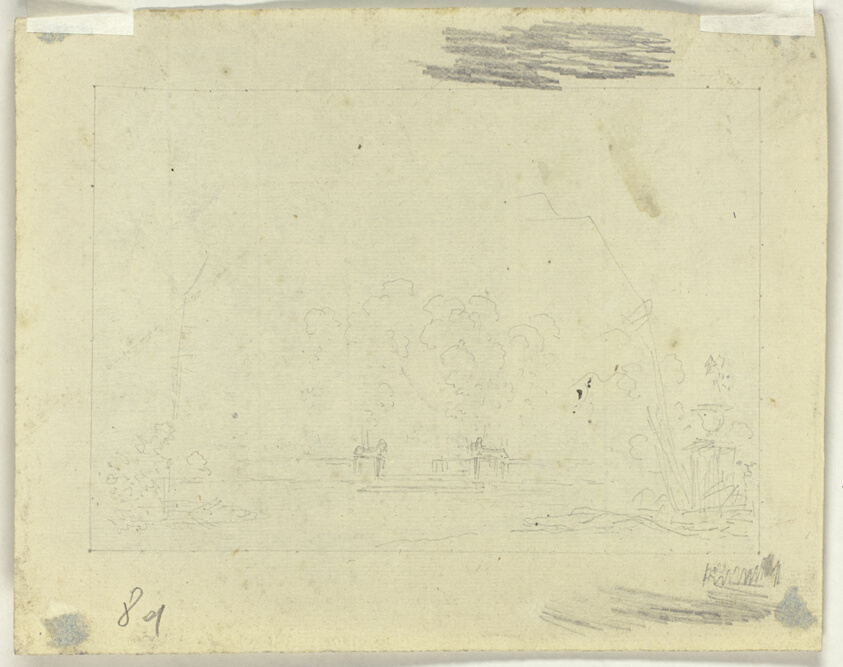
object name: Drawing and Watercolor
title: Sheet of Sketches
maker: Pierre Antoine Mongin (French, 1761-1827)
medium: Graphite on cream laid paper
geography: France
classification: drawings (visual works); prints and drawing